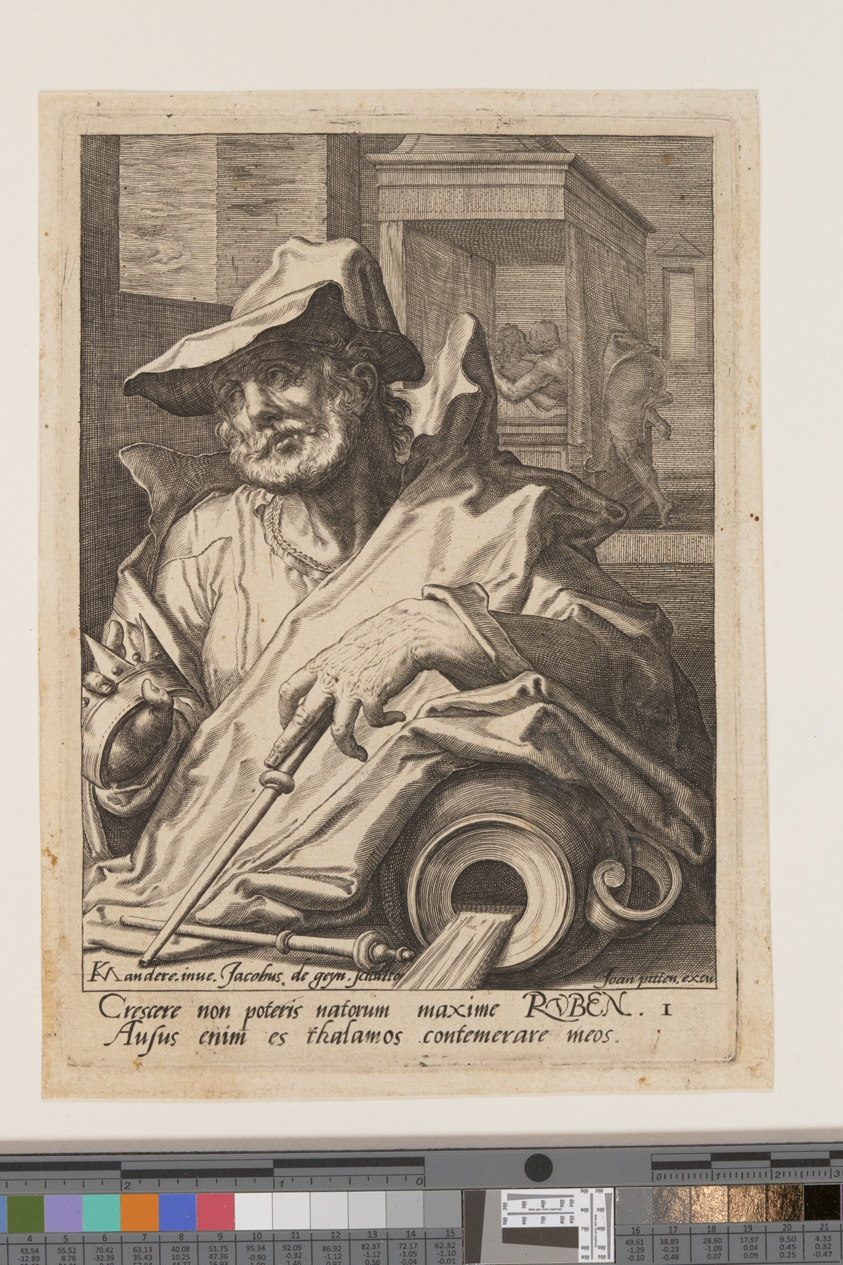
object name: Print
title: Ruben, from The Twelve Sons of Jacob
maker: Jacques de Gheyn II (Dutch, 1565–1629); after Karel van Mander (Dutch, 1548–1606)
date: c. 1589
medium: Engraving on ivory laid paper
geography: Netherlands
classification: engraving; paper; print; prints and drawing